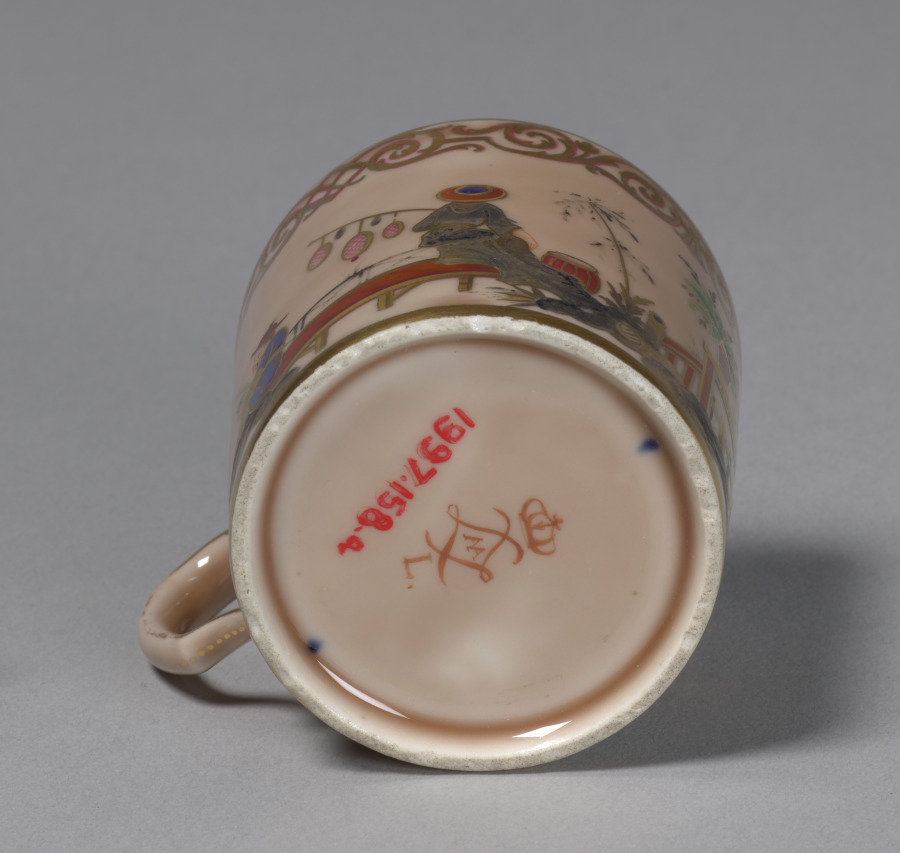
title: Cup (Gobelet litron)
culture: France, Sèvres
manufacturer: Sèvres Porcelain Factory (French, est. 1756)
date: 1778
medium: hard-paste porcelain with overglaze enamel decoration and gilt and silver decoration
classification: Ceramic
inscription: Interlaced Ls surmounted by a crown with date letters 'AA' enclosed; 'L.' below for Louis-François l'Ecot (in red)